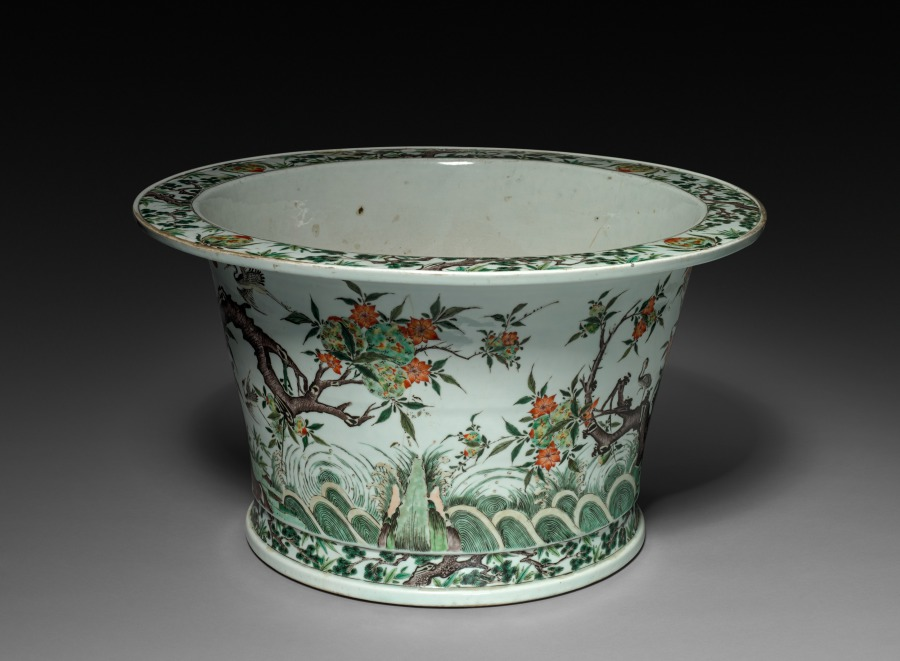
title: Jardiniere with Cranes and Peaches over Waves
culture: China, Jiangxi province, Jingdezhen kilns, Qing dynasty (1644-1911), Kangxi reign (1661-1722)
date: 1662–1722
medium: porcelain with famille verte overglaze enamel decoration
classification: Ceramic